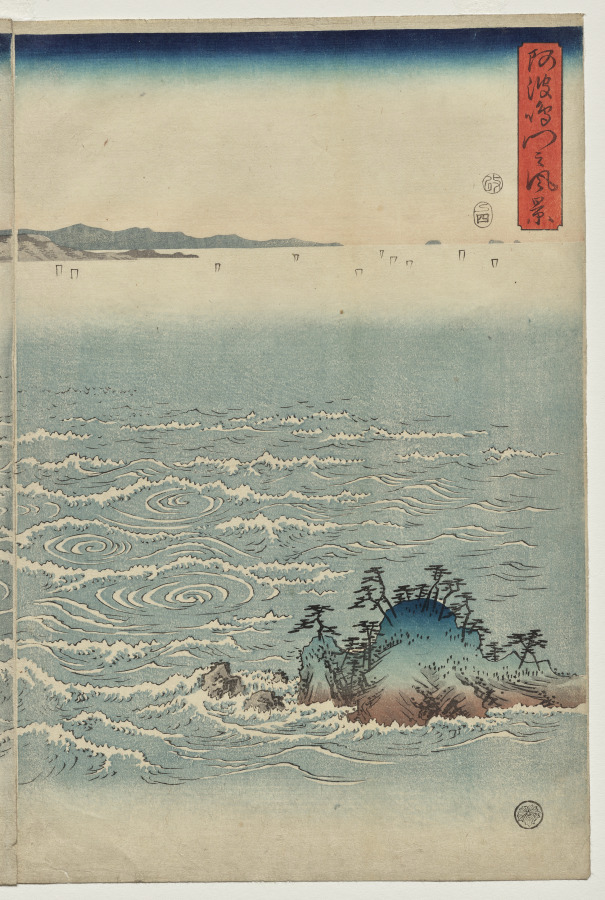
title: The Whirlpools of Awa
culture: Japan, Edo period (1615–1868)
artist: Utagawa Hiroshige (Japanese, 1797–1858)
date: 1857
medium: One of a triptych of color woodblock prints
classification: Print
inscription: Signature: Hiroshige hitsu (on left panel) Publisher: Okazawaya Taheiji (emblem) Censorship Seal: aratame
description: Late in his career, Hiroshige explored the poetic theme of setsugekka, “snow, moon, and flowers,” in a set of three triptychs. The swirling whirlpools at Awa would remind the viewer of flowers.